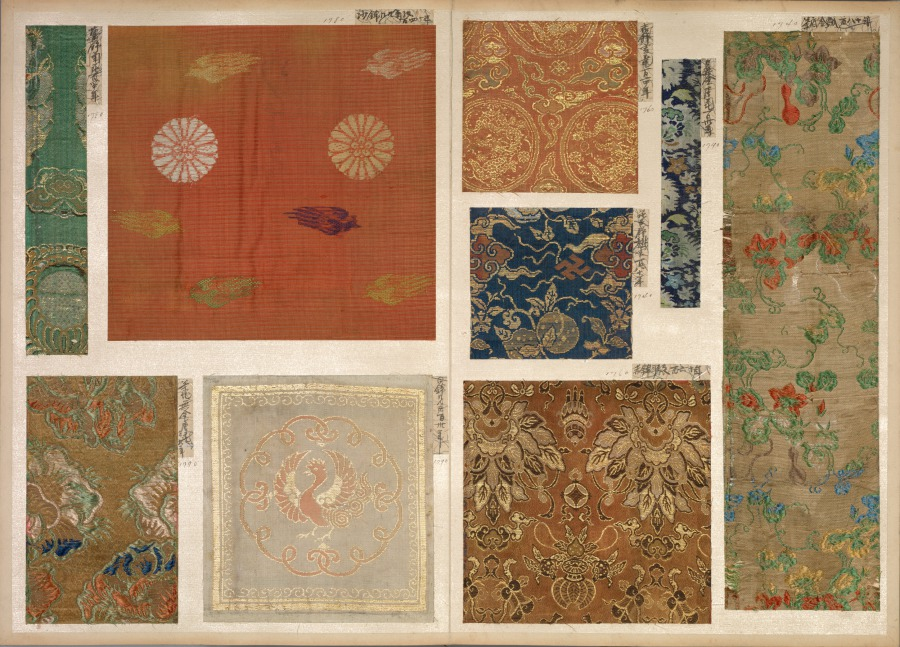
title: Album of Textile Samples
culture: Japan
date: 1790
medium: silk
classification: Textile